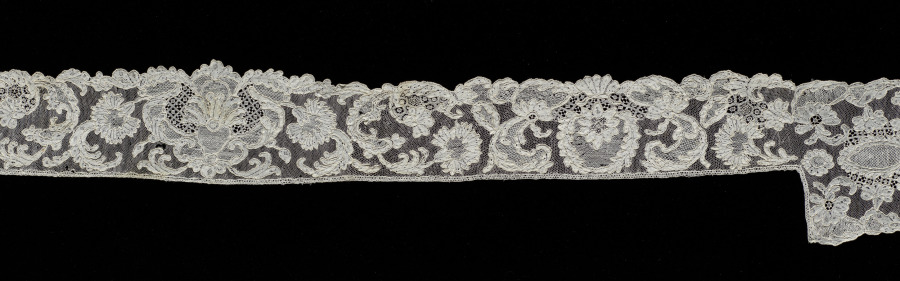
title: Lace Lappets and Edging for Cap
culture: France, Alençon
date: 1700–1715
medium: Needle lace (Point d'Alençon)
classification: Lace